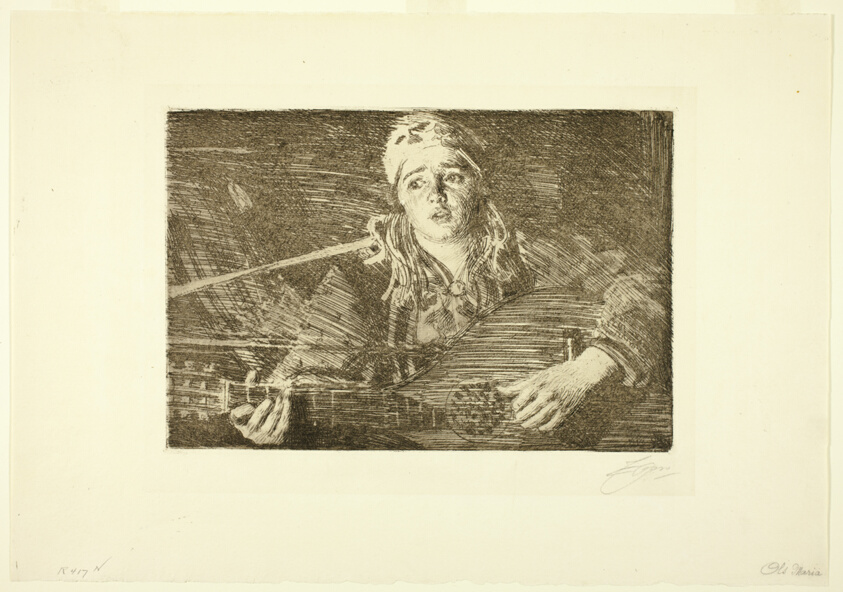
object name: Print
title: Ols Maria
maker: Anders Zorn (Swedish, 1860-1920)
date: 1919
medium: Etching on cream laid paper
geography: Sweden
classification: etching; print; prints and drawing